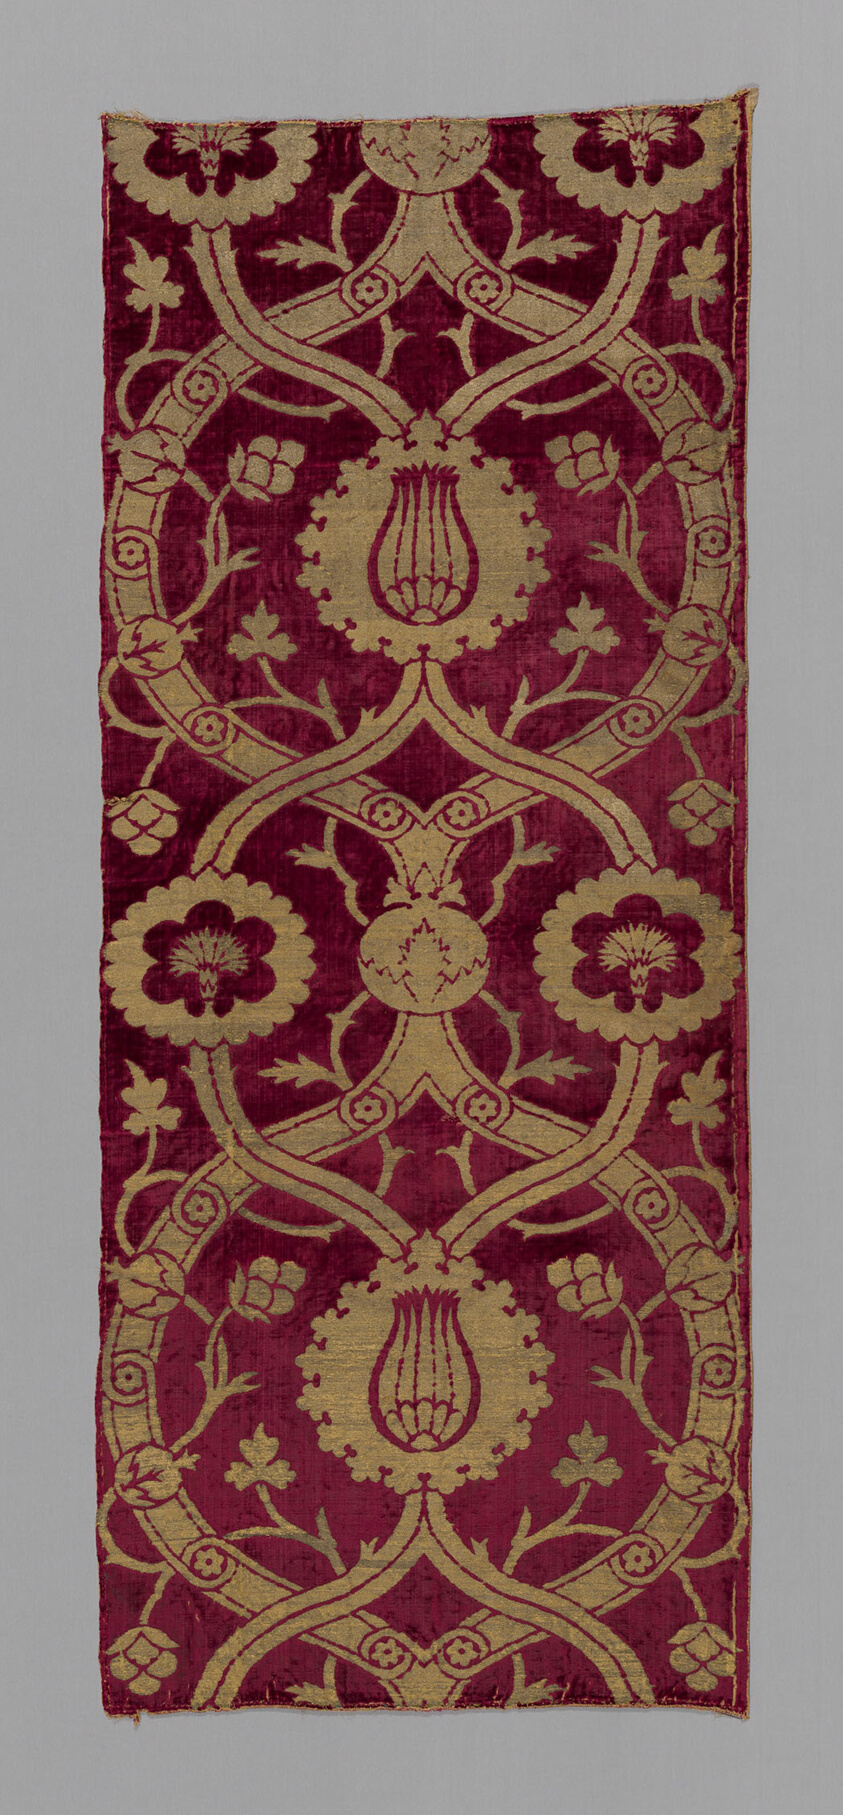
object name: Textile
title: Panel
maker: Turkey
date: 1550/75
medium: Silk, satin weave with gilt-metal-strip-wrapped silk discontinuous supplementary facing wefts and supplementary pile warps forming cut voided velvet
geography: Turkey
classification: textile; weaving - velvet; weaving